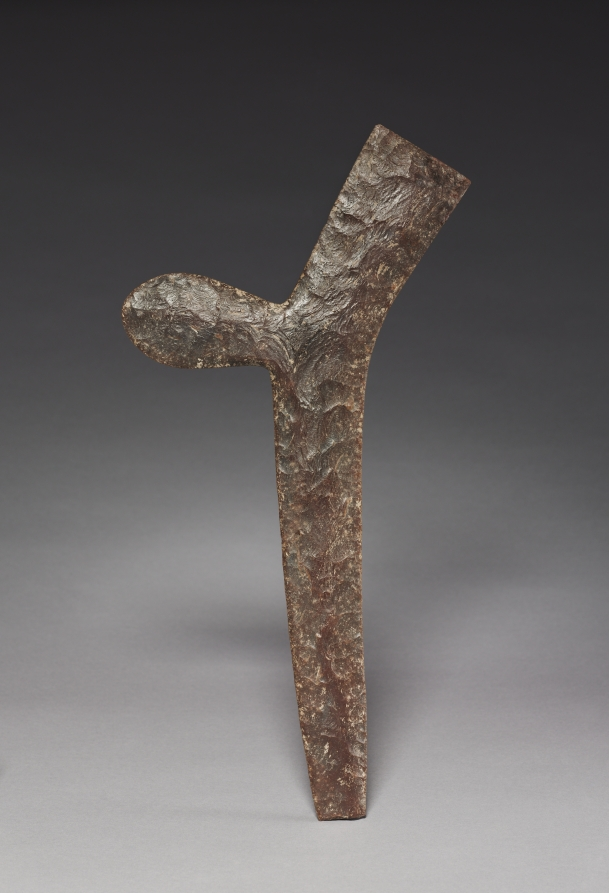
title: Axe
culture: Mexico or Central America, Maya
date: c. 250–900 CE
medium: chipped flint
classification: Implements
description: Axes with stone blades and wooden hafts were used to clear land for planting. This more fragile example, made entirely of chipped flint, is a ceremonial version probably used in rituals before it was deposited in a tomb or an offering. Late Classic Maya vase paintings make the ceremonial associations of axes clear. In these painted scenes, axe-wielding deities dance among skeletons and supernatural animals, or raise the axe to strike a sacrificial victim.